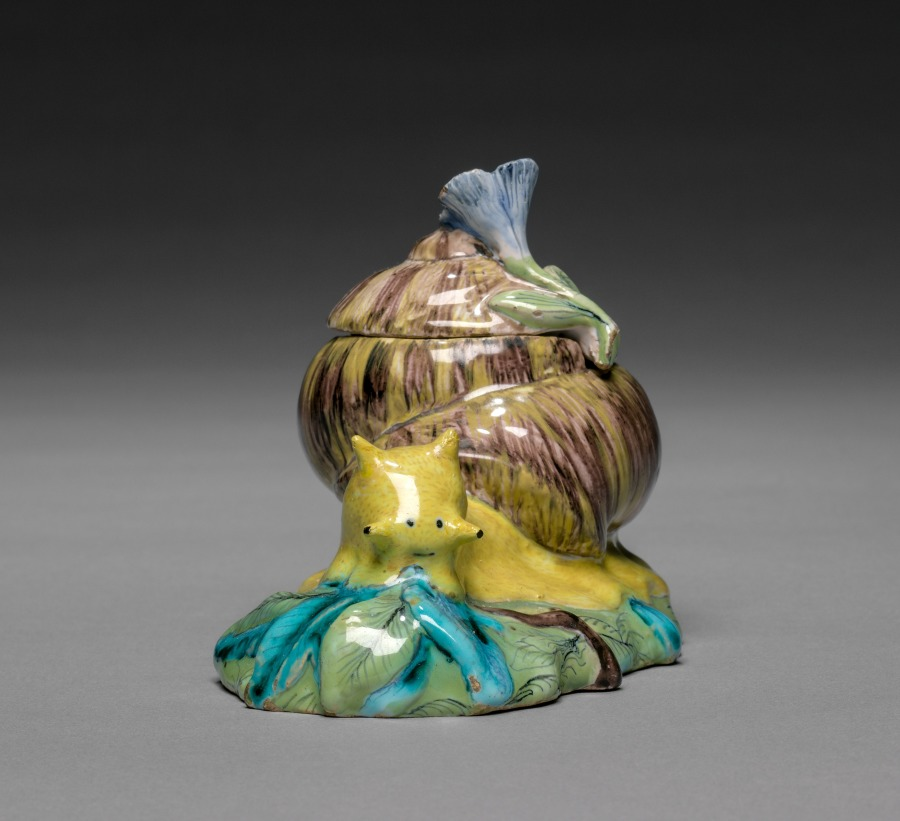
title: Covered Box in the Form of a Snail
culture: France, 18th century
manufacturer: Strasbourg Factory (France)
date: c. 1750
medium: faience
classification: Ceramic